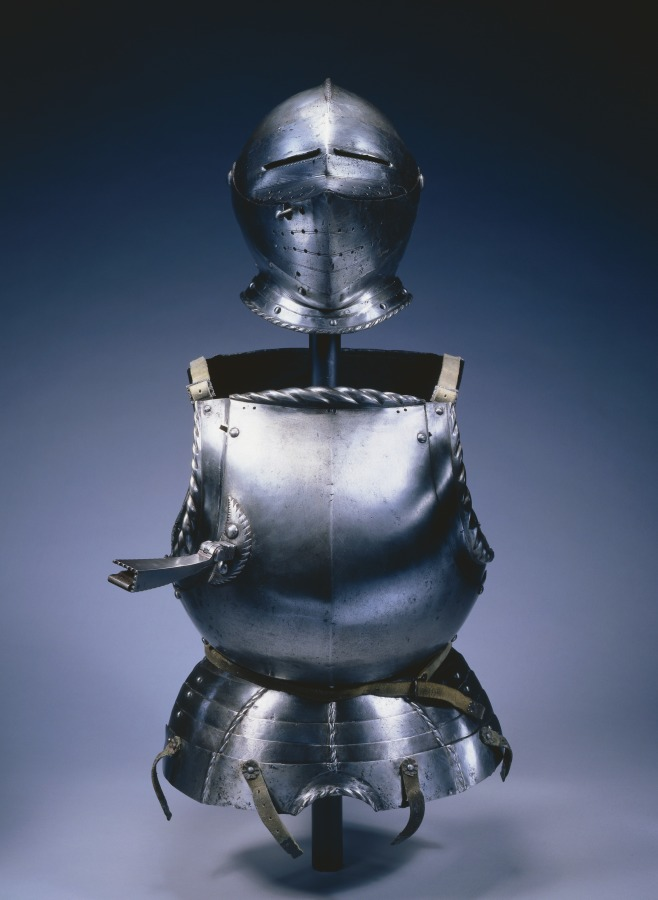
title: Elements from a Partial Suit of Armor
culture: Germany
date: c. 1510–30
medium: steel with black paint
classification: Arms and Armor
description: This partial suit of armor contains a close helmet, breastplate, and backplate. Below the breast plate is the fauld, plates of armor that extend below the breastplate to protect the waist and hips. The breastplate includes a lance rest, a metal flange that could be brought down when needed. The lance rest helps spread the impact of a blow through the breastplate to the torso of the wearer, thus redirecting the force of the blow away from the hand, wrist, elbow, and shoulder. The helmet is a true "close helmet"; it pivots open at the rivets on the side and completely protects the face when lowered.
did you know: Unfortunately the remainder of this suit of armor has been lost to history.